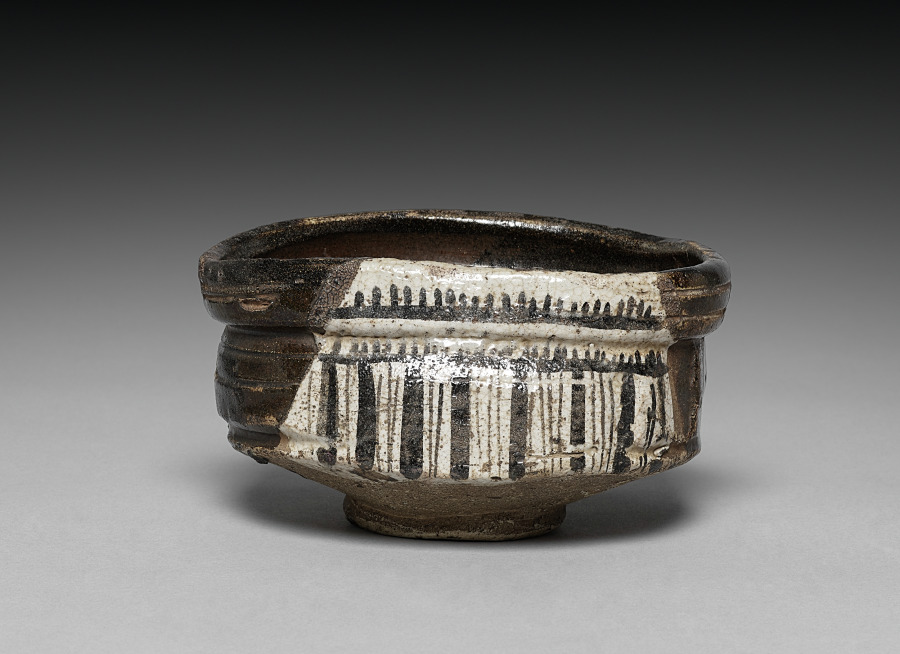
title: Clog-shaped Teabowl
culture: Japan, Momoyama period (1573–1615)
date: early 1600s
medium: Glazed stoneware (Mino ware, Oribe type)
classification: Ceramic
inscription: Mark: cross on base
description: Tea gatherings are fundamental to Japanese culture. Teabowls like this one are the most important objects used in tea practice. Its oblong shape and bold abstract designs are the signature style of the time period in which it was produced. That style is called Oribe, named for the tea master who championed the aesthetic.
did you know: Oribe is a government position. It means the person in charge of textiles.